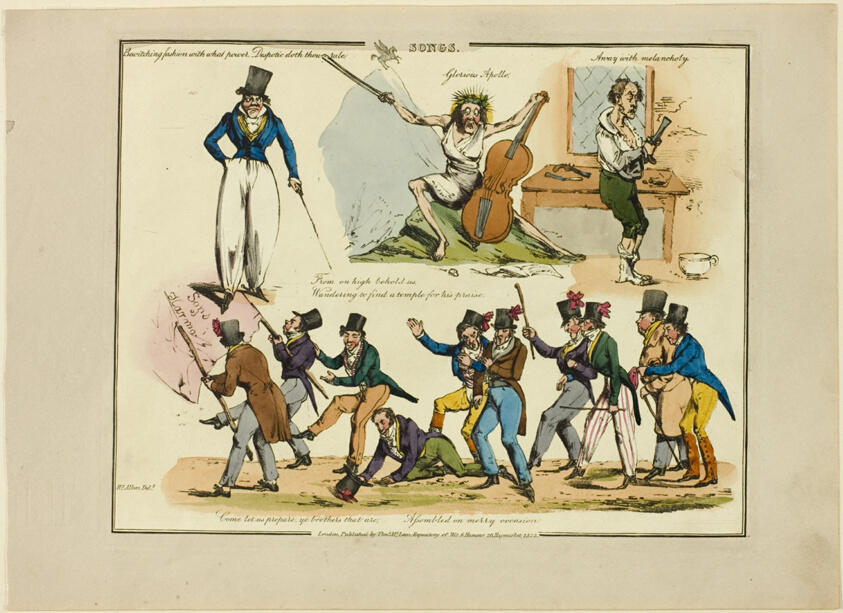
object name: Print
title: Plate from Illustrations to Popular Songs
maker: Henry Alken (English, 1785-1851); published by Thomas McLean (English, active 1790-1860)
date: 1822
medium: Soft ground etching with hand-coloring and aquatint on paper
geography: England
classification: etching; print; prints and drawing